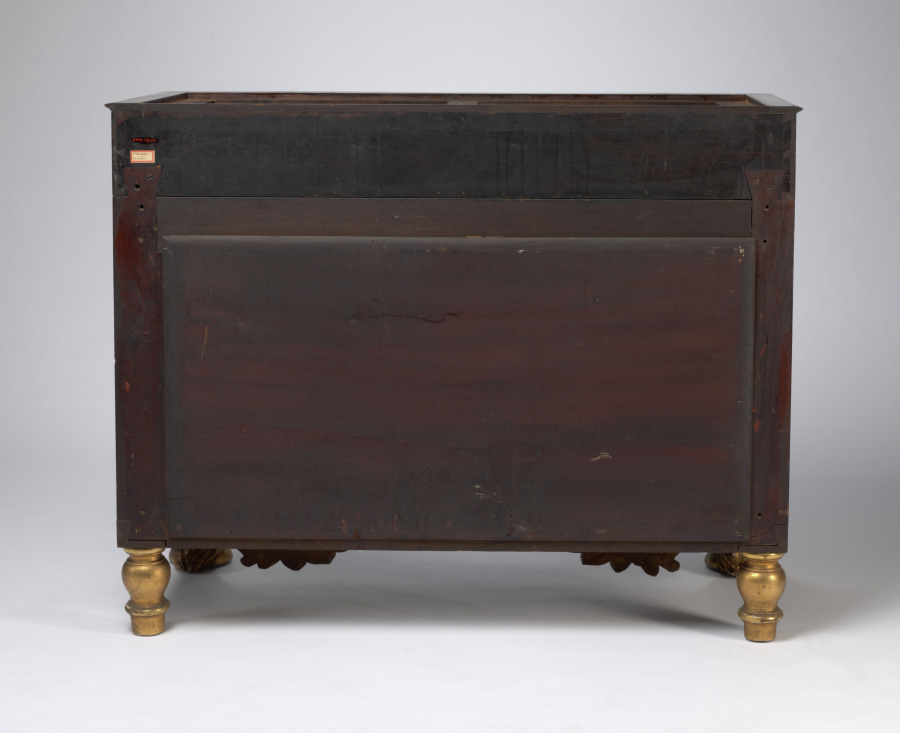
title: Console Table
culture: America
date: 1820–30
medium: mahogany and mahogany veneer with marble top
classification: Furniture and woodwork